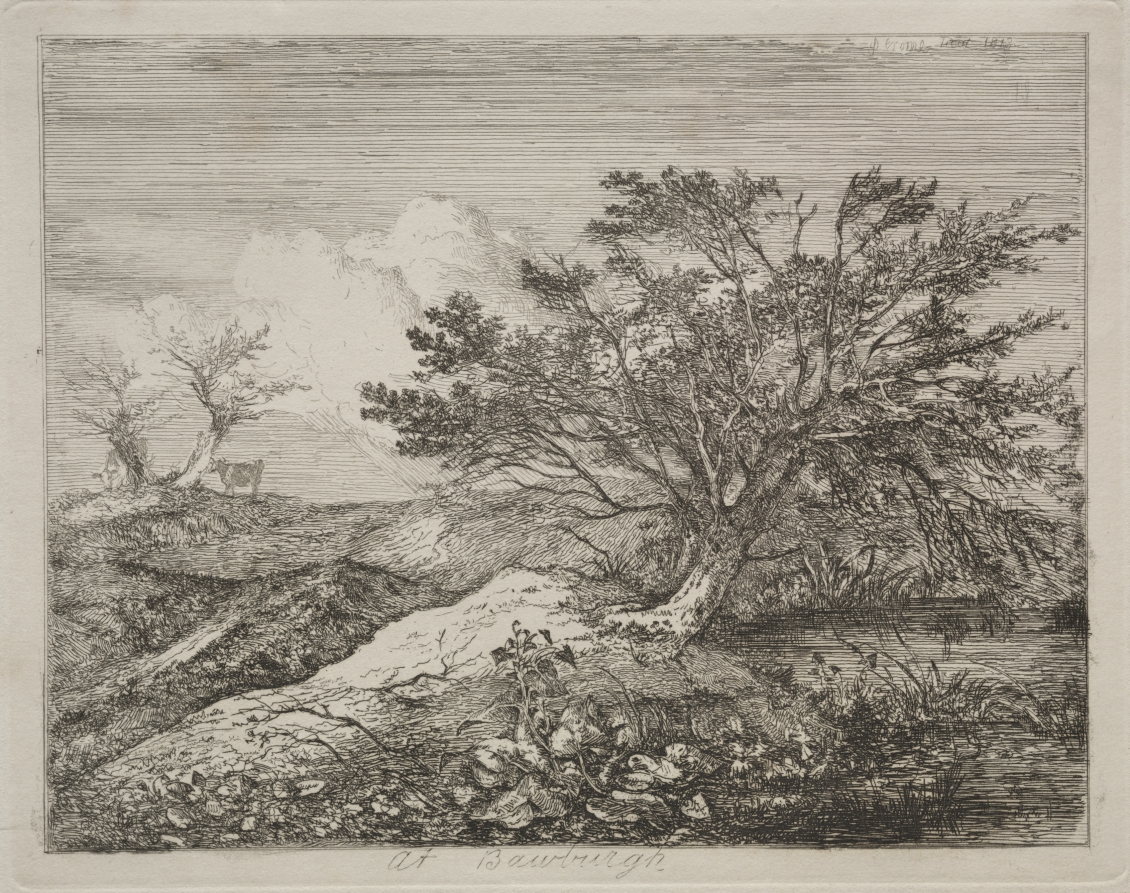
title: At Bawburgh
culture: England, 19th century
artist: John Crome (British, 1768–1821)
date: 1813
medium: etching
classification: Print